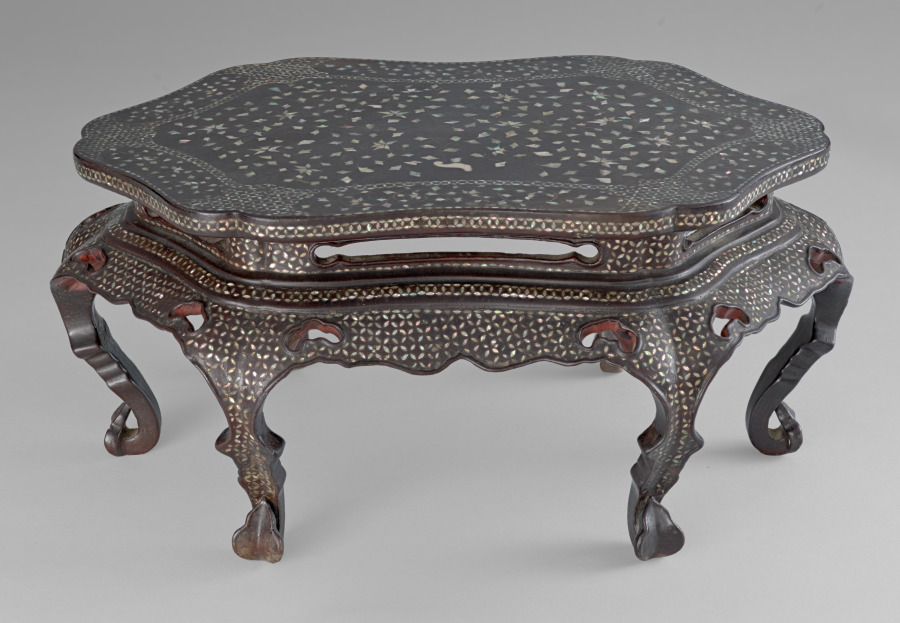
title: Hexafoil-Shaped Table with Mother-of-Pearl Inlay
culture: Korea, Joseon dynasty (1392–1910)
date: late 1400s–early 1500s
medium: Inlaid abalone shells on black lacquer ground, applied with red lacquer on the interior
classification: Lacquer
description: This low table showcases intricate mother-of-pearl and twisted brass-wire inlay forming chrysanthemum scrolls and floral lattices against black lacquer. As one of the few surviving early Joseon lacquer works employing the rare brass-wire technique, it reflects refined craftsmanship made for elite patrons. Likely used in Buddhist offering ceremonies, it would have supported precious ritual objects such as rolls of sutras or miniature Buddhist statuary.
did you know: The use of inlaid twisted brass wires in this mother-of-pearl lacquer table was first introduced in the twelfth century and is believed to have been employed in high-quality lacquerware through the end of the fifteenth century.